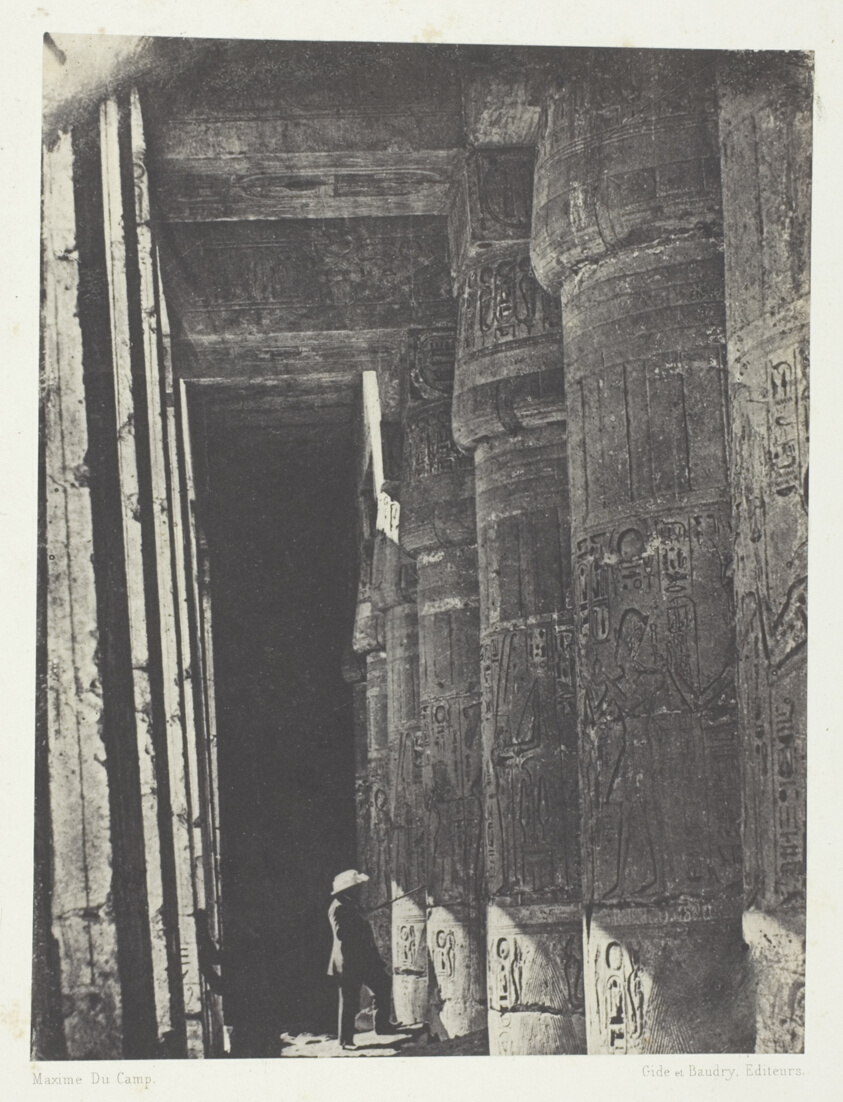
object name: Photograph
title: Médinet-Habou, Galerie du Palais de Ramsès-Méiamoun; Thèbes, plate 52 from the album "Egypte, Nubie, Palestine et Syrie" (1852)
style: 19th century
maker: Maxime Du Camp; French, 1822–1894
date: 1849/51, printed 1852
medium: Salted paper print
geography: France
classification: salted paper print; photographic process; photography; photograph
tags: Collected by Hugh Edwards, Egypte, Nubie, Palestine et Syrie